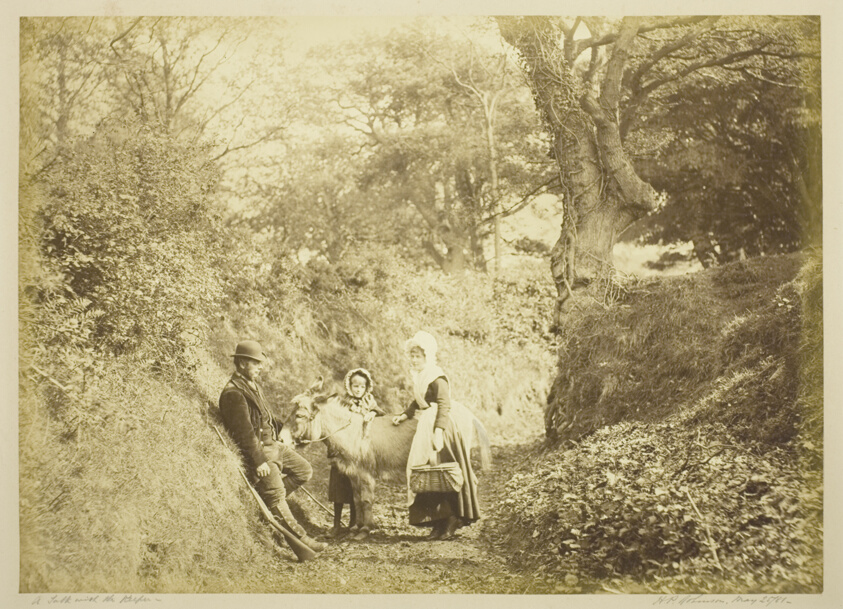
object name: Photograph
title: A Talk with the Keeper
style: Pictorialism, 19th century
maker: Henry Peach Robinson (English, 1830–1901)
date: May 25, 1881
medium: Albumen print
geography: England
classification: albumen silver print; photographic process; photography; photograph